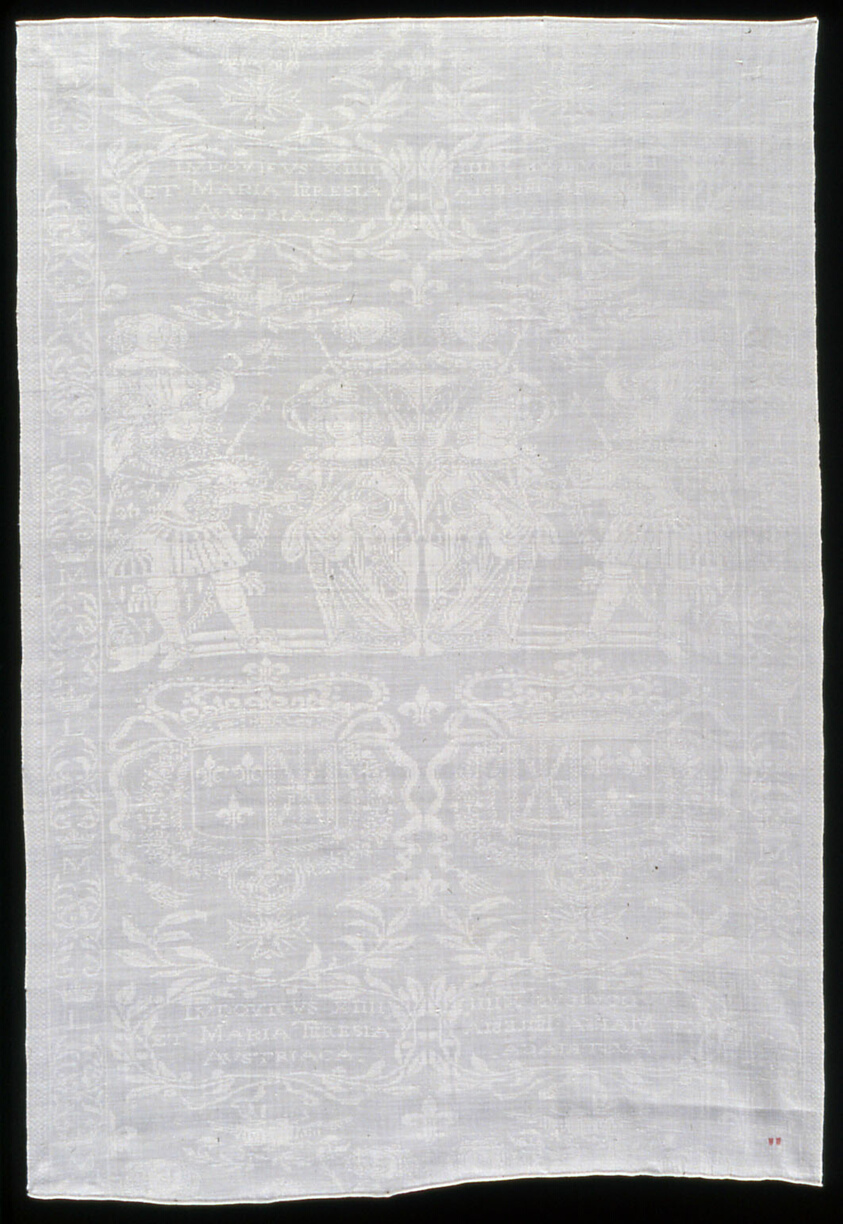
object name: Textile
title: Table Napkin Commemorating the Marriage of Louis XIV (1638–1715) and Marie-Therese (1638–1683) in 1660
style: louis xiv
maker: France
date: c. 1660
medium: Linen, satin weave self-patterned by reversing of faces: initials embroidered in cotton floss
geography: France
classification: textile; weaving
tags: propaganda, coat of arms, royalty